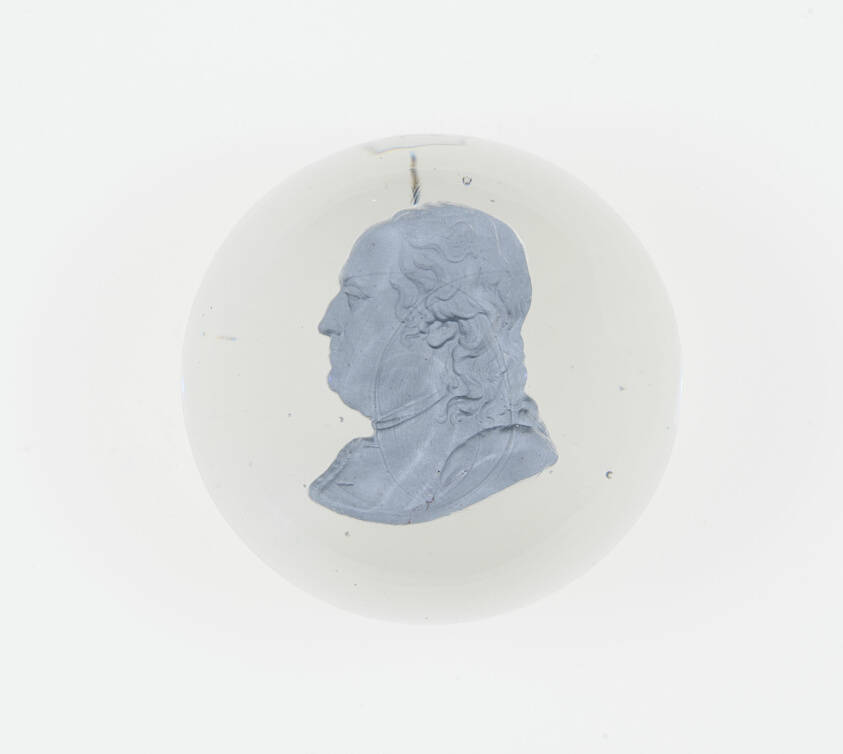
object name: Glass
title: Paperweight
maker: Clichy Glassworks (Cristalleries de Clichy); Clichy, France, 1837-1885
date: c. 1846–55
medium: Glass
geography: Clichy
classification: paperweight; sulphide (glass); european decorative arts; glass